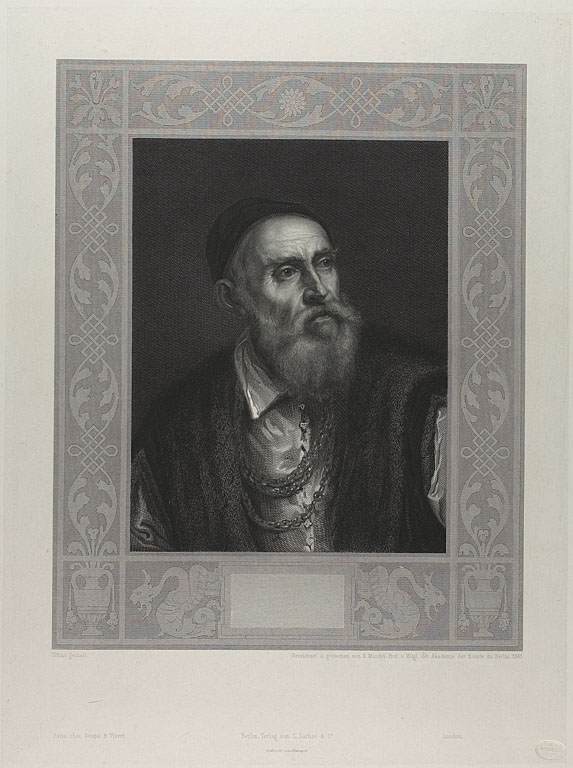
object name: Print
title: Portrait of Titian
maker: Johann August Eduard Mandel (German, 1810-1882); after Titian (Italian, c. 1488-1576)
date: 1843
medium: Engraving in black on paper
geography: Germany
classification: engraving; print; prints and drawing